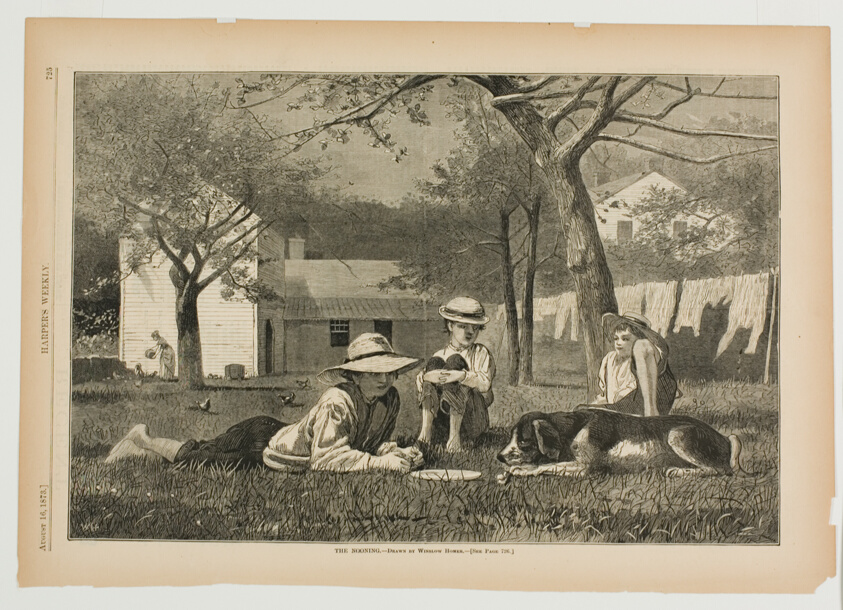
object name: Print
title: The Nooning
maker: Winslow Homer (American, 1836-1910); published by Harper's Weekly (American, 1857-1916)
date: published August 16, 1873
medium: Wood engraving on paper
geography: United States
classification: wood engraving; print; prints and drawing